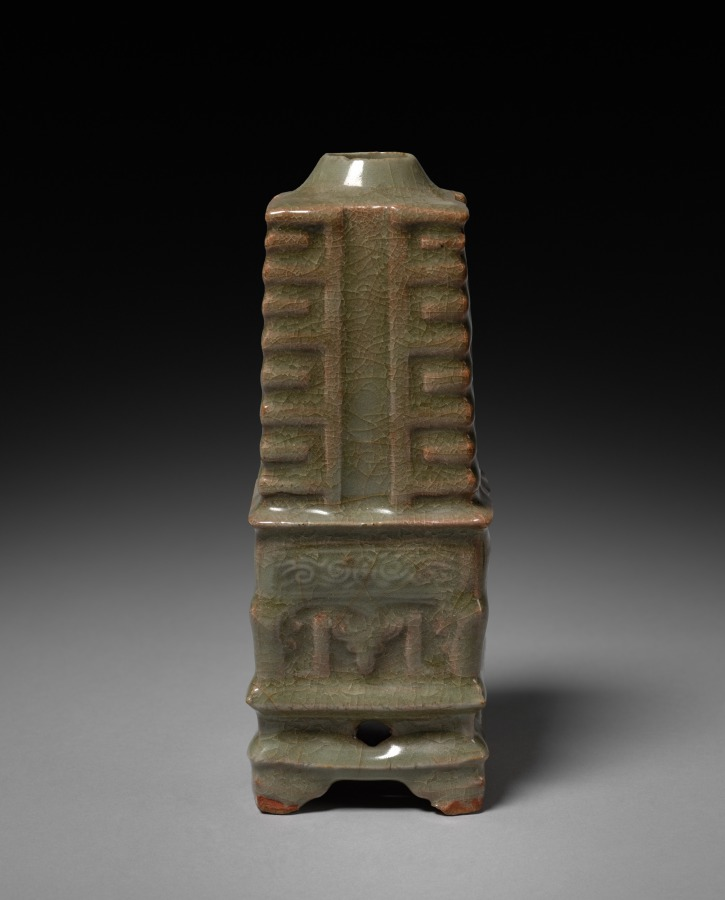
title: Vase in Shape of Cong: Southern Celadon Ware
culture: China, Zhejiang province, Yuan dynasty (1271-1368)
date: 1271–1368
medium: glazed buff stoneware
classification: Ceramic